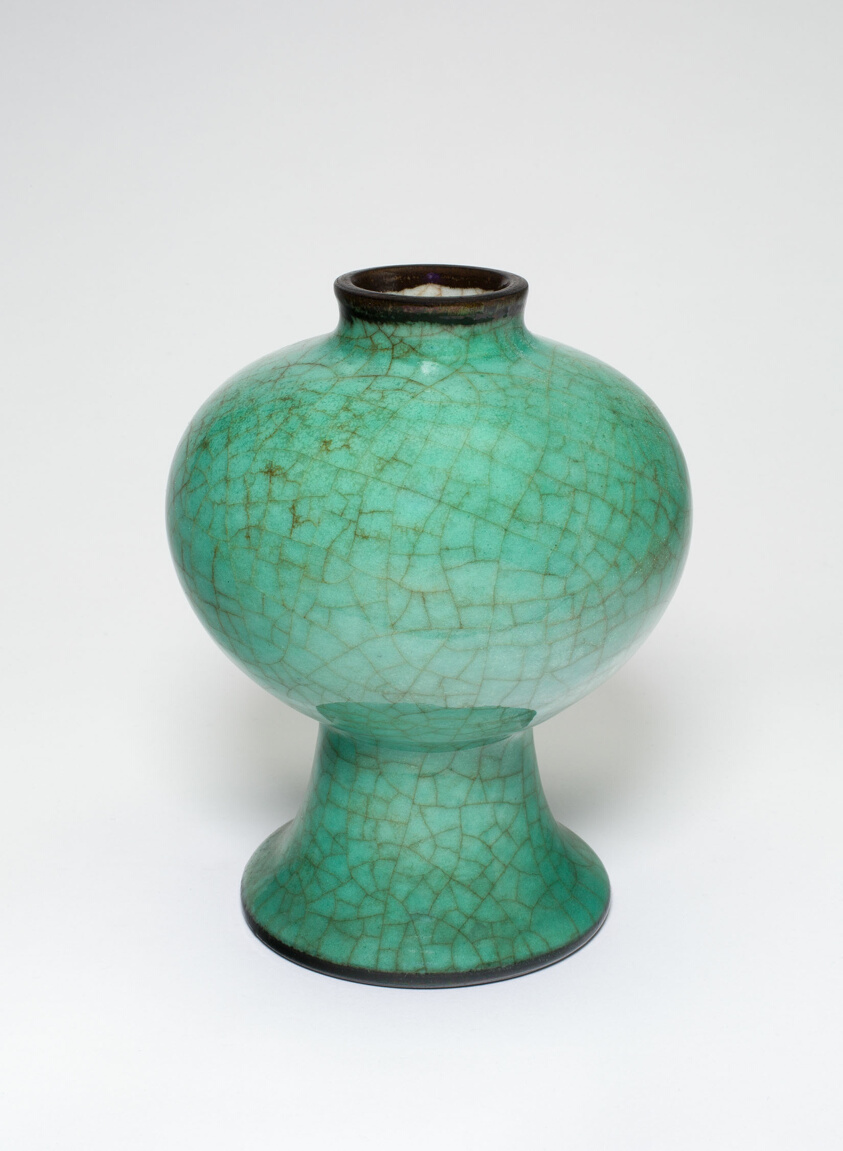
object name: Vessel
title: Vase with Globular Body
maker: China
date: Qing dynasty (1644–1911), Kangxi period (1662–1722)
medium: Porcelain with green crackled glaze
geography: China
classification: porcelain; asian art; ceramics